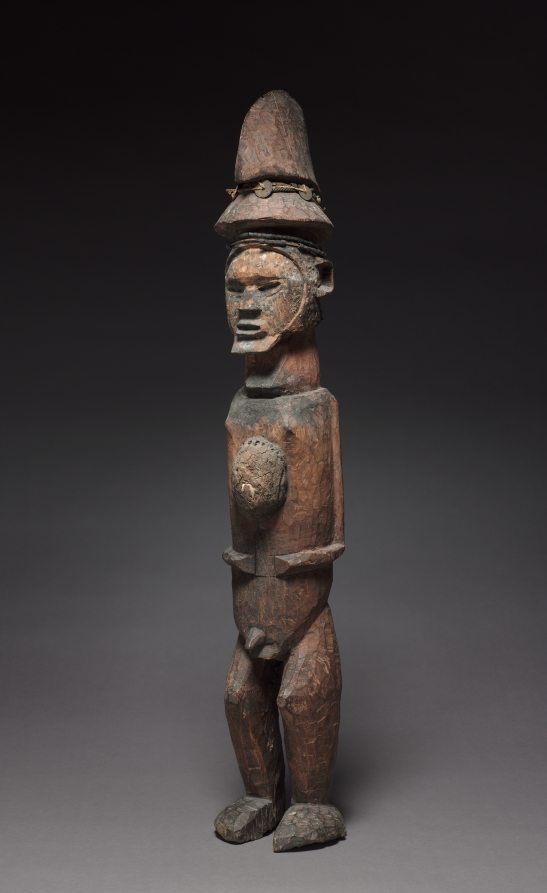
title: Male Figure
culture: Africa, Central Africa, Republic of the Congo (most likely) or Democratic Republic of the Congo, Teke-style maker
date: late 1800s-early 1900s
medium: Wood, resin, iron, copper, plant fiber, cloth, glass beads, coins, antelope horns, and cowrie shells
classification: Sculpture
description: This exceptionally large Teke figure is well preserved and holds a medicine package partly buried in an abdominal cavity. Its size suggests that it stood at the service of a larger group of people and that its powers extended beyond the limits of a village. Its scarification marks and beard identify it as representing a chief or another dignitary.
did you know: The coins on the figure’s hat were those used in the Belgian Congo.